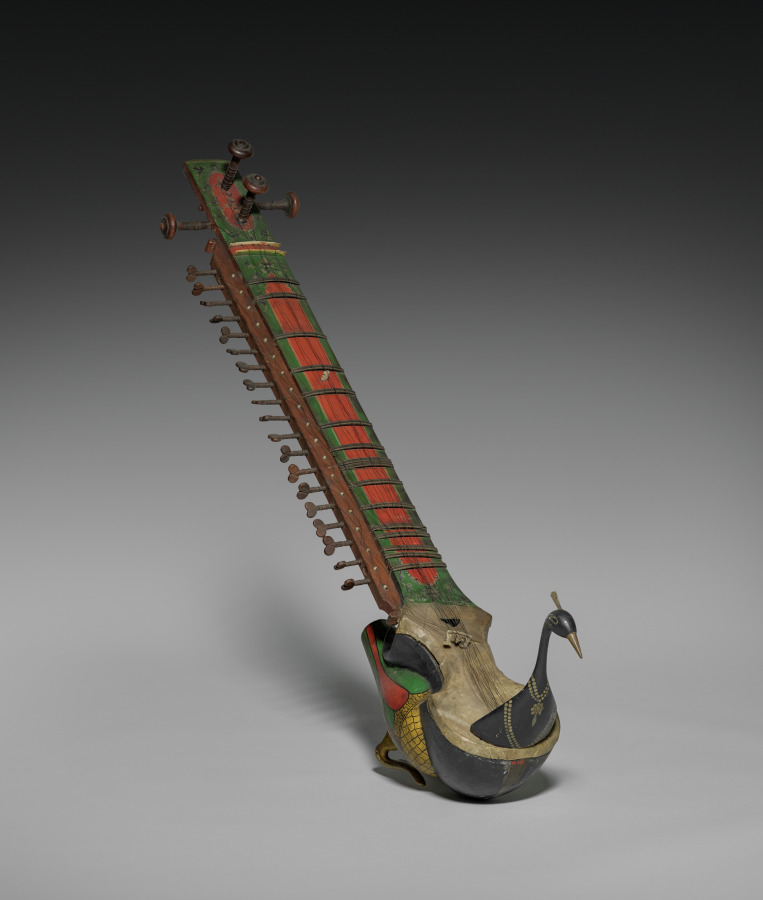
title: Taus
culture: India, Punjab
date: c. 1800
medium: Polychromed wood, parchment, bone or ivory, gut, and metal strings; frets: bronze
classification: Musical Instrument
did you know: The taus was designed by a Sikh Guru to combine the sounds of string instruments and the plaintive cry of the peacock.